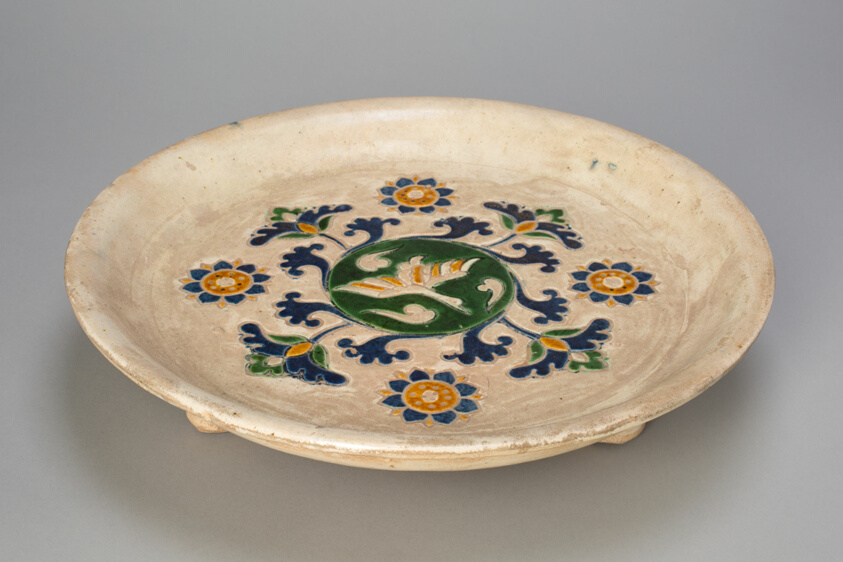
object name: Vessel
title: Tripod Dish with Flying Goose, Stylized Flowers and Vines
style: Chinese (culture or style)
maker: China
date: Tang dynasty (618–907)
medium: Slip-coated earthenware with three-color (sancai) lead glazes and underglaze mold-impressed decoration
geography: China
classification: dish (vessel); earthenware; asian art; ceramics; vessel